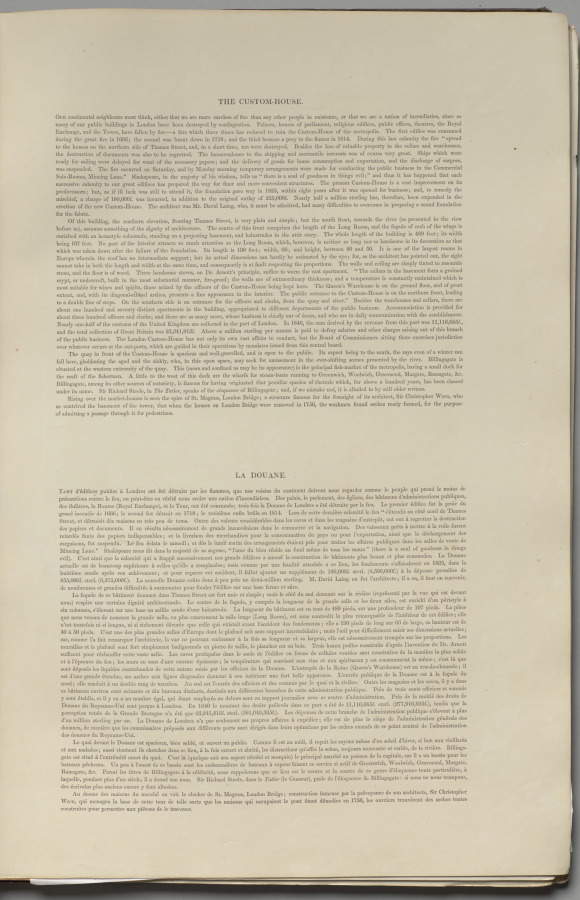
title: London As It Is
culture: England, 19th century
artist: Thomas Shotter Boys (British, 1803–1874)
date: 1842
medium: lithograph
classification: Bound Volume